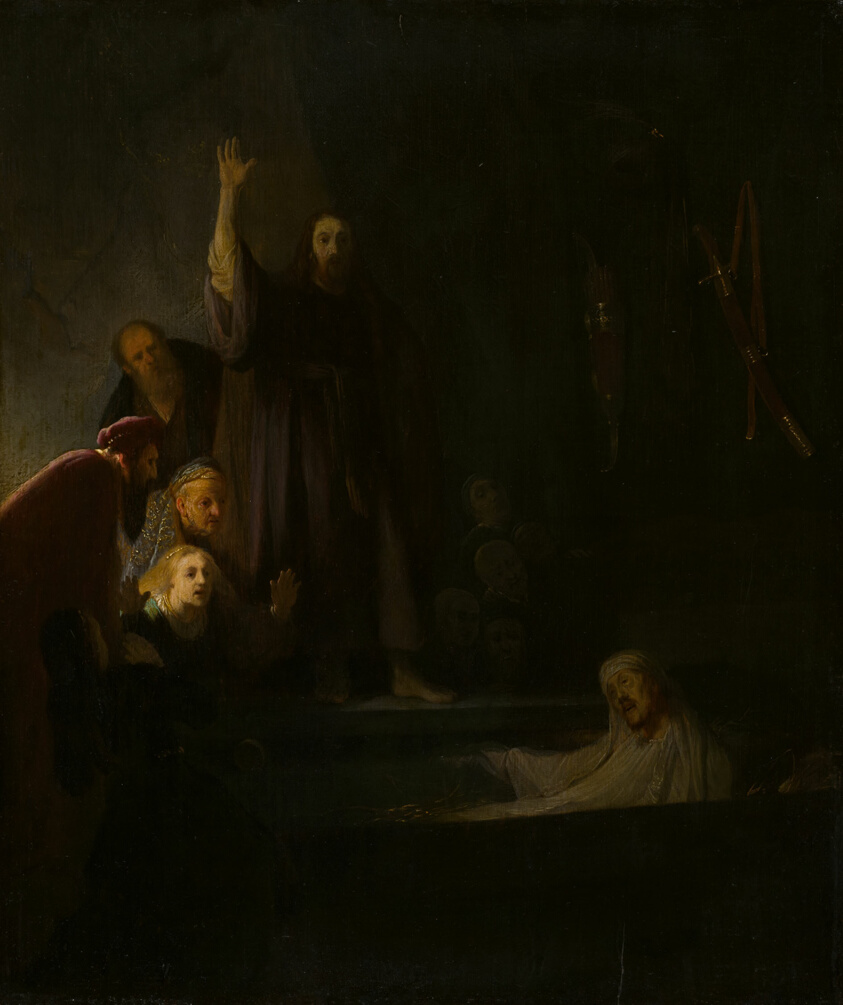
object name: Painting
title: The Raising of Lazarus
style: 17th Century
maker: Follower of Rembrandt van Rijn (Dutch, 1606–1669)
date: 1630/35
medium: Oil on panel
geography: Holland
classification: oil on panel; paint; oil paintings (visual works); dutch; painting; european painting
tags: resurrection scenes, Christian subjects, Christianity, religion, religious, religious scenes, religious figures, biblical, Jesus, man, women, men, night, light, lighting